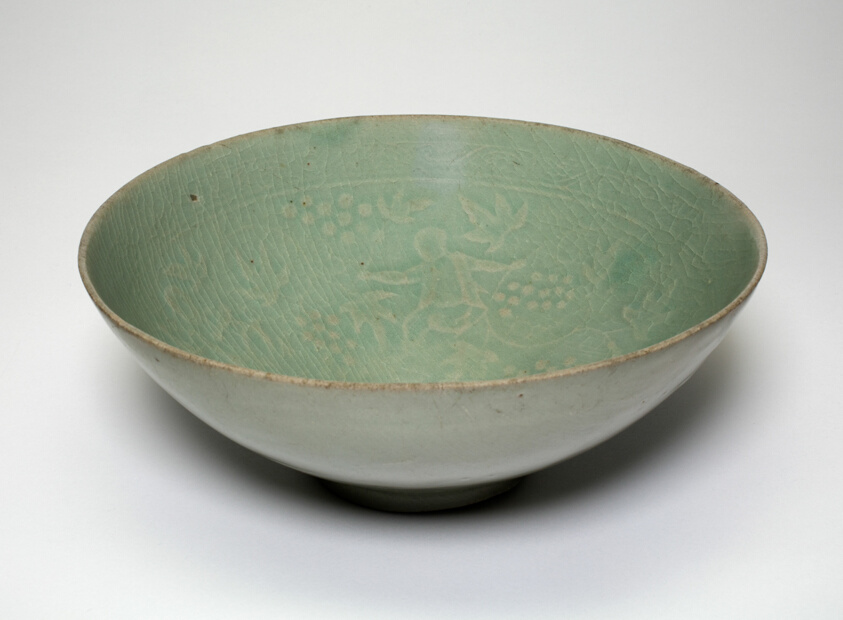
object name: Vessel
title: Bowl with Boys and Grapes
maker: Korea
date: Goryeo dynasty (918–1392)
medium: Celadon-glazed stoneware with underglaze mold-impressed deocration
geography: Korea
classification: ceramics; asian art; vessel